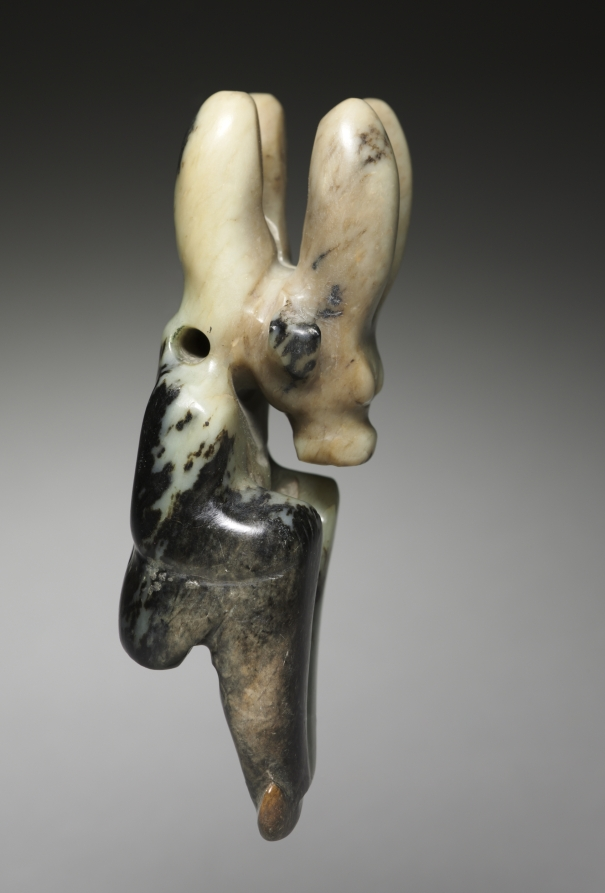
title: Amulet in the Form of a Seated Figure with Bovine Head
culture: Northeast China, Neolithic period, probably Hongshan culture (4700–2920 BCE)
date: c. 4700–2920 BCE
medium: jade (nephrite)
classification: Jade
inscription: There are two paper labels on the back of the jade pendant: one partial label with Chinese characters and one with the typed number "150".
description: With a bovine head and four horns, this seated figurine was a powerful ritual and shamanic symbol. Drill holes above its shoulders form two interconnected perforations for suspension, suggesting that the jade was originally used as a pendant, presumably by the shaman performing the tasks of journeying to and communicating with the supernatural realms.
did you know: CMA daringly acquired this masterpiece without knowing exactly what it was. Only after Chinese archaeologists started excavating similar jades in Northeast China could it be attributed to the Hongshan culture.